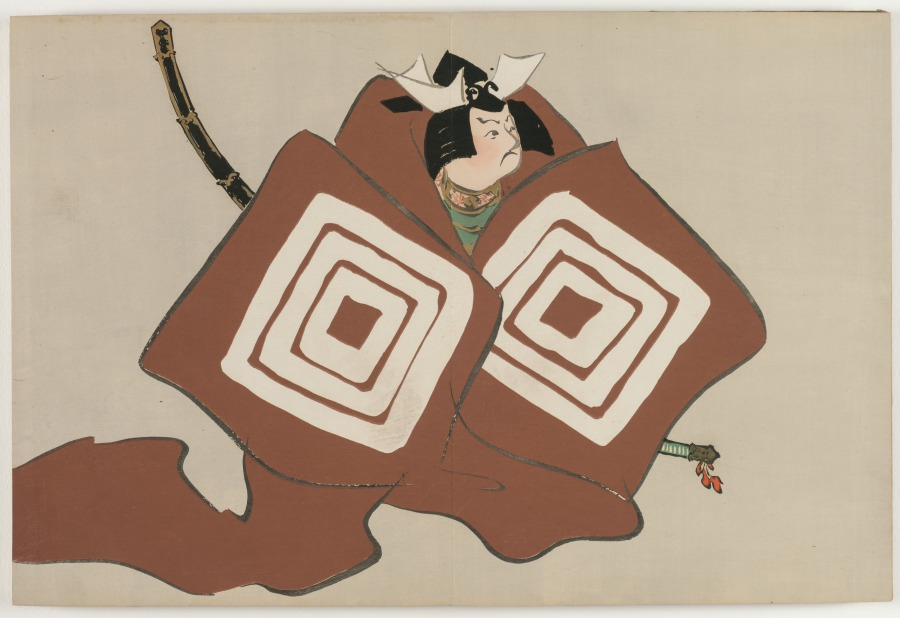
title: Flowers of a Hundred Worlds (Momoyogusa): Shibaraku (Shibaraku)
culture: Japan, Meiji period (1868–1912)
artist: Kamisaka Sekka (Japanese, 1866–1942)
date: 1909–10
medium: color woodcuts with gold and silver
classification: Bound Volume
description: This print from a set of three woodblock printed albums displays the graphic design prowess of Kamisaka Sekka. The images were first distributed one by one to subscribers to the series but later were reissued in bound form, like this book, for mass consumers. Each print features a vignette taken from nature or Japanese literature. Many of the scenes have a long history in Japan, originating in the 900s or 1000s and having been interpreted by all manner of artists since that time. Sekka’s selections hew closely to precedents from the Rinpa style originated by painter Tawaraya Sōtatsu (c. 1570–c. 1640) and calligrapher Hon’ami Kōetsu (1558–1637).